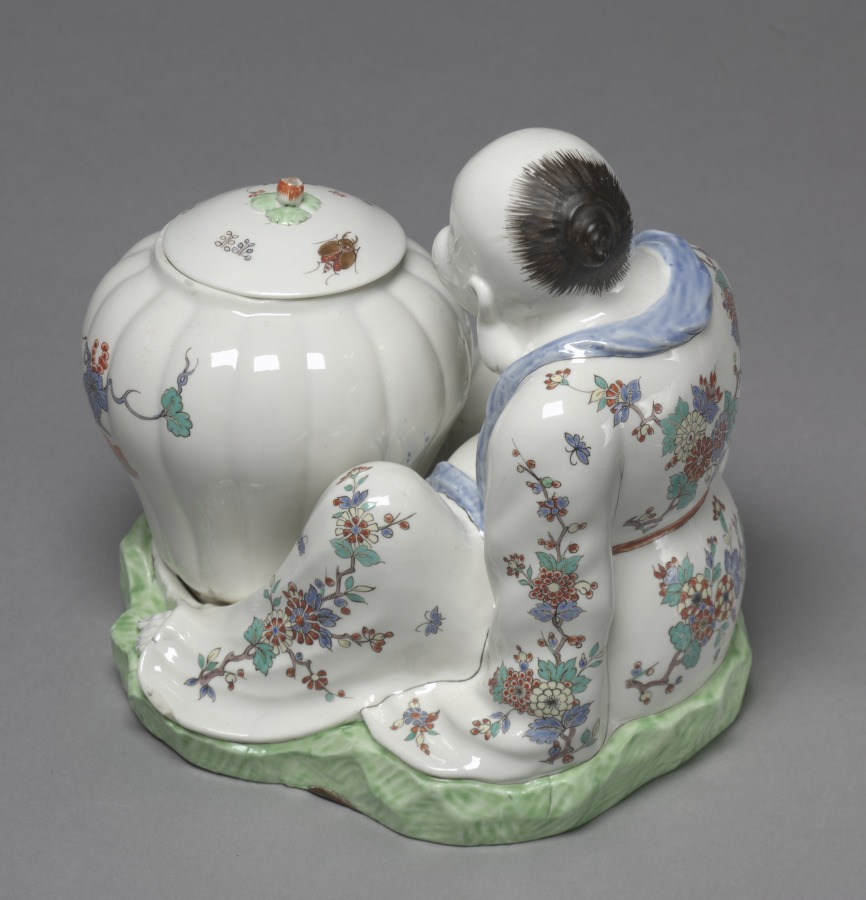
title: Figure of Budai or Hotei with Jar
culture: France, Chantilly, 18th century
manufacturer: Chantilly Porcelain Factory (French)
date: c. 1735–40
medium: Tin-glazed soft-paste porcelain with enamel decoration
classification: Ceramic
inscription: [Mark of the Chantilly factory (red hunting horn), on bottom]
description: The production of decorative figures like this one, referred to as magots or pagodes in European texts, was the result of an 18th-century European interest in Chinese and Japanese culture and porcelain. Budai, pronounced Hotei in Japanese, was a semilegendary Chinese monk known in Japan through the transmission of Chan Bhuddism. This figure’s decoration with multicolor overglaze enamels on a milky-white is typical of Japanese Kakiemon style.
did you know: In 1735, the Chantilly factory was given a 25-year royal privilege for the manufacture of objects that imitated Japanese porcelain.